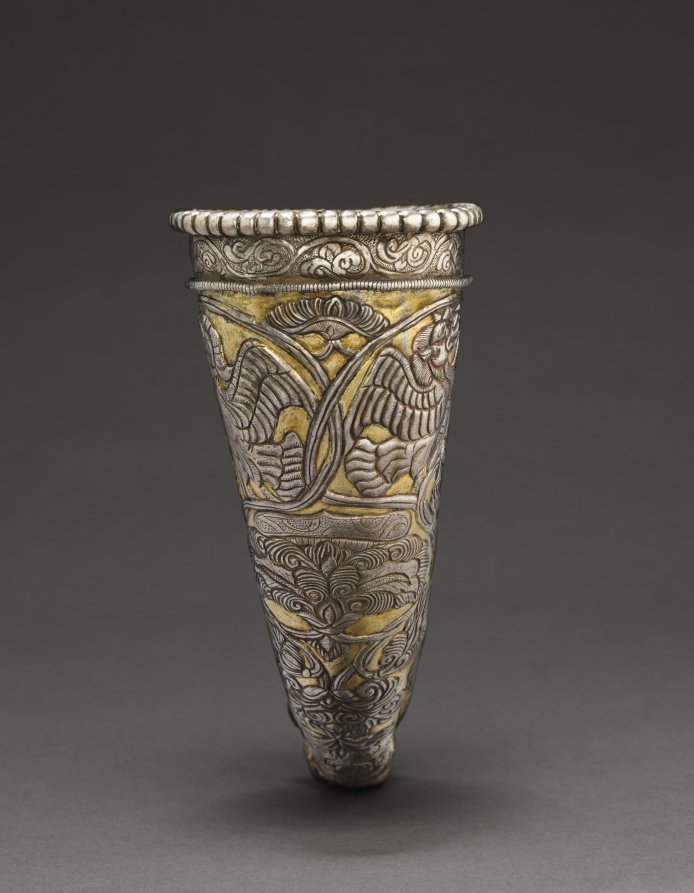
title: Rhyton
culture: Central Asia (Sogdiana) or Tibet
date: c. late 600s–early 700s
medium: silver with gilded foil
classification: Silver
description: The form of the animal-headed rhyton as a drinking vessel and the use of silver are evidence of cultural exchange with Persia, while the lush, luxurious quality of the design and the form of the lions and curling dragon on one side of the decanter reveal an awareness of Chinese forms. Poured into the large opening at the top of the horn, wine then flowed out through the small tube held between the parted lips of a bovine-like animal. To keep from spilling, drinkers could stop the flow of the liquid by holding a thumb over the lower aperture.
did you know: This drinking horn was a communal vessel which guests would pass around to share wine at parties.